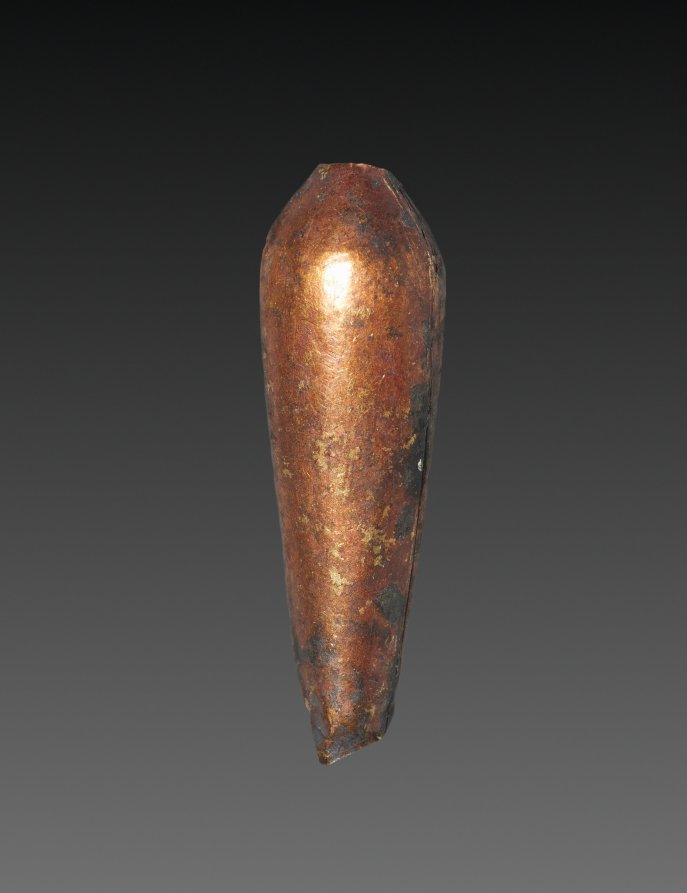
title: Teardrop-Shaped Bead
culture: Egypt, Middle Kingdom (2040–1648 BCE), Dynasty 12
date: 1980–1801 BCE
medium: gold over calcite gesso core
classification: Jewelry